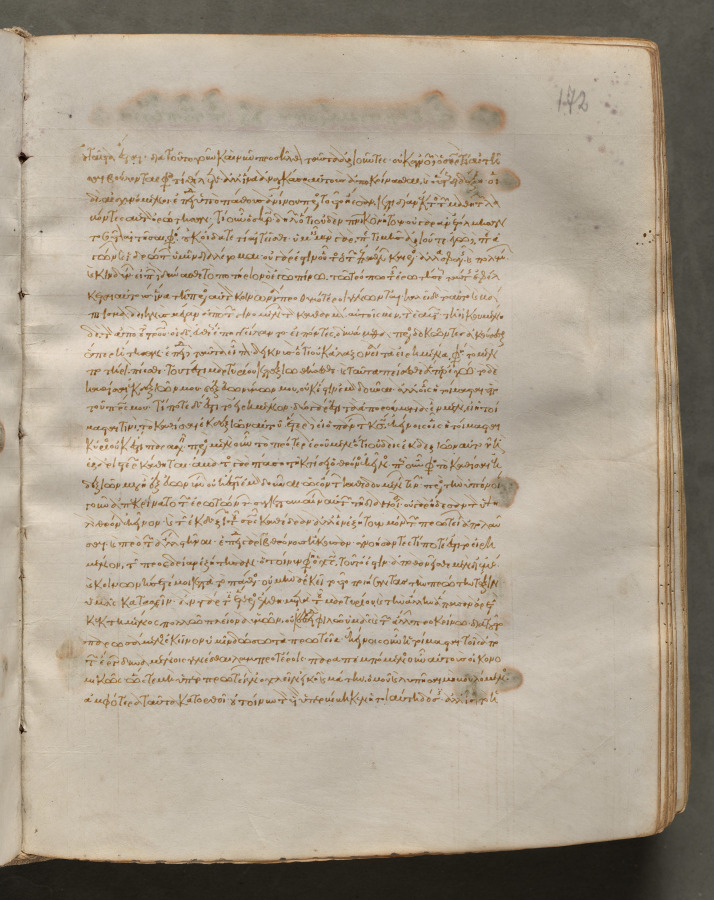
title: Text, folio 172 (recto), from a Gospel Book with Commentaries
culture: Byzantium, Constantinople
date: c. 1000–1100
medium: ink, tempera, and gold on vellum; leather binding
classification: Bound Volume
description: Each of the four gospels in this book opens on a page with brilliantly illuminated borders depicting the author of the text as well as birds-principally peacocks, symbols of the immortality of the soul-and fountains, representing the fountain of life and the salvation of the soul. This volume consists of 428 leaves with texts in Greek. Its level of sophistication suggests that it was probably written and decorated in a monastery in Constantinople.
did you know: Gospel Books were carried in procession through Byzantine churches.